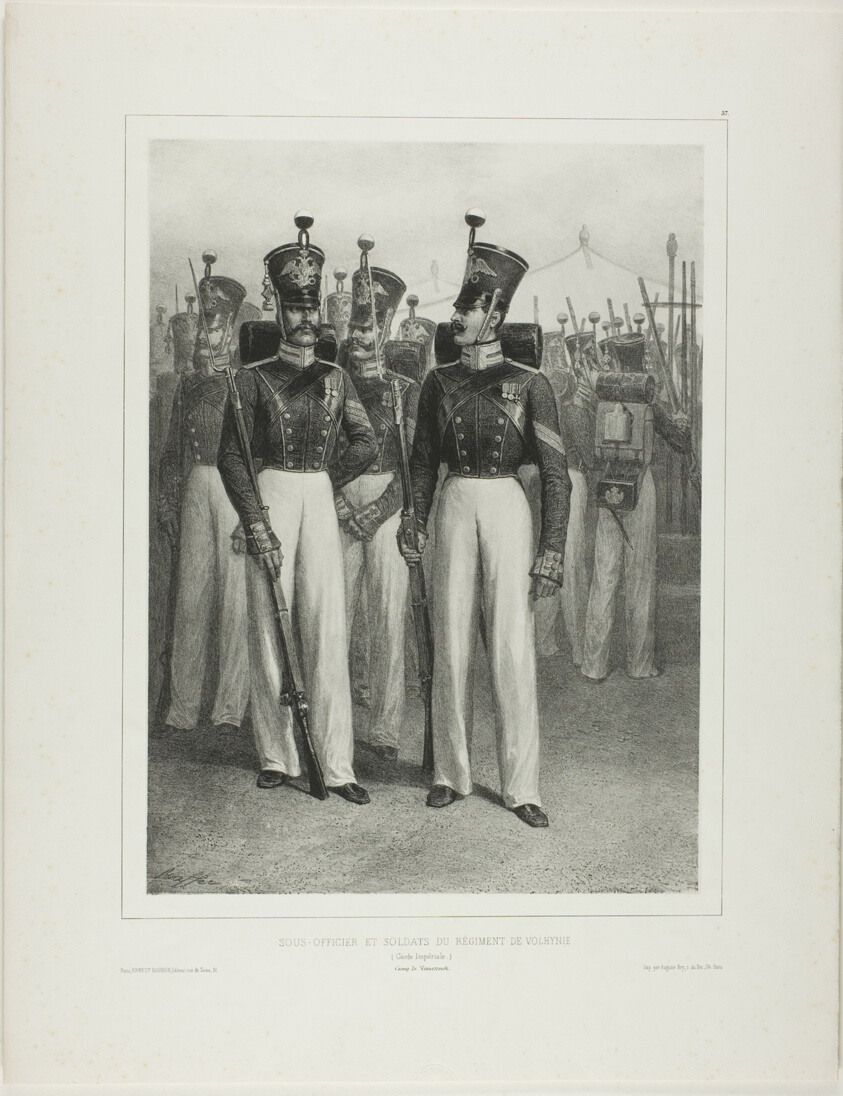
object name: Print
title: Non-Commissioned Officer and Soldiers of the Volhynie Regiment (Imperial Guard), Camp Vosnessensk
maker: Denis Auguste Marie Raffet (French, 1804-1860); printed by Auguste Bry (French, 19th century); published by Éditeur Ernest Bourdin (French, active 19th century)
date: 1842–44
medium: Lithograph in black on ivory chine laid down on ivory wove paper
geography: France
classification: lithograph; print; prints and drawing